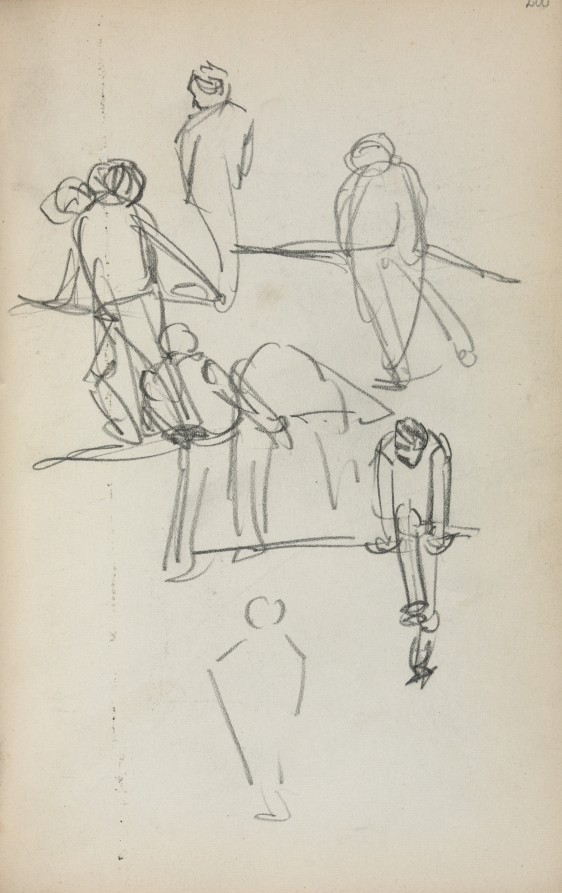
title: Italian Sketchbook: Figures (page 200)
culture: America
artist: Maurice Prendergast (American, born Newfoundland [now Canada], 1858–1924)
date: 1898–1899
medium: pencil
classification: Bound Volume